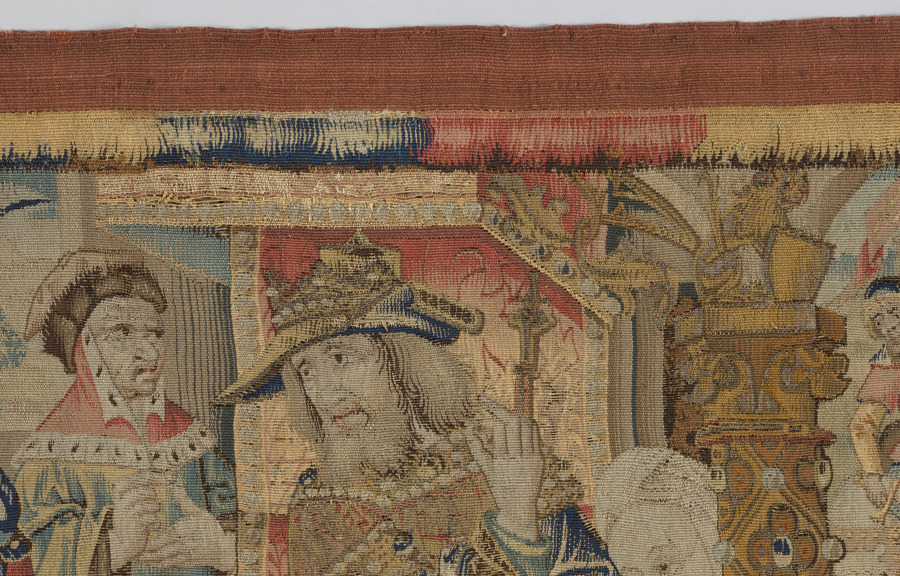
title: Altar Frontal: Scenes from the Childhood of Christ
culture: France and South Netherlands, 1500s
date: c. 1500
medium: Wool, silk, gold thread; tapestry weave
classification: Tapestry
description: Pictorial tapestries were symbols of wealth and more highly prized than paintings. Small tapestries with Christian imagery were frequently commissioned to embellish the fronts of altars. This example displays the Massacre of the Innocents, the Flight into Egypt, and Christ among the Doctors. Tapestry weave is ideal for creating narrative scenes. The technique can be compared to painting, as each colored weft (horizontal thread) is interlaced with warps (vertical thread) where needed for the pattern. As expensive investments, tapestries have the advantage of being portable and easily stored and displayed.